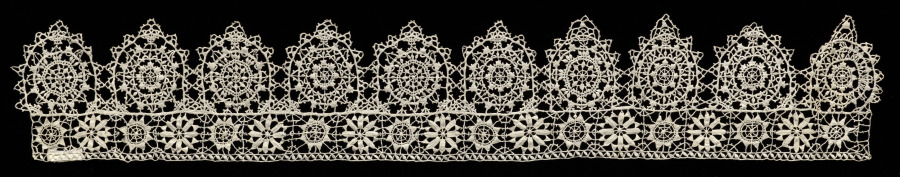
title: Lace Fragment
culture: Italy, Genoa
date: 1550–99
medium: Needle lace (reticella) insertion and edging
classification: Lace